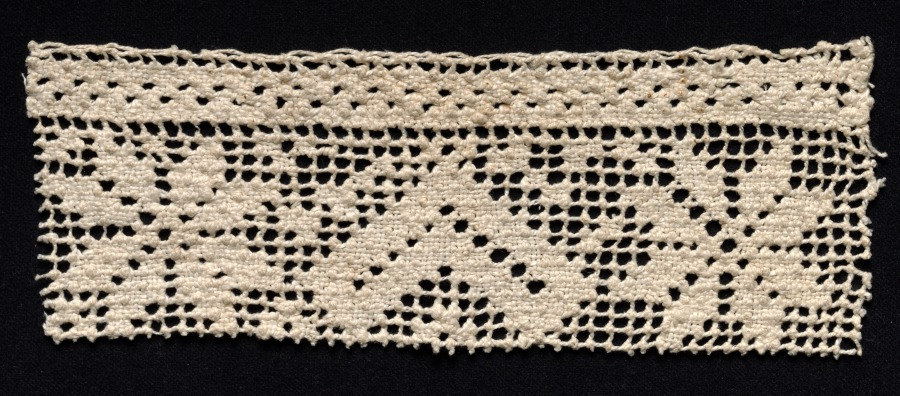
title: Fragment of a Band with Floral Motif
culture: Spain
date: 1600s–1700s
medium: Bleached linen (est.): needle lace (knotted ground and darned in two directions)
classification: Lace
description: Though this fragment of lace is completed in the filet/lacis technique, the floral motif imitates a form of needle lace particular to Spain known as Ruedas or Sol Lace, due to its radial patterns.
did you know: Myrta Leonora Jones, the donor of this work, was a women’s rights activist in Cleveland in the early 20th century.